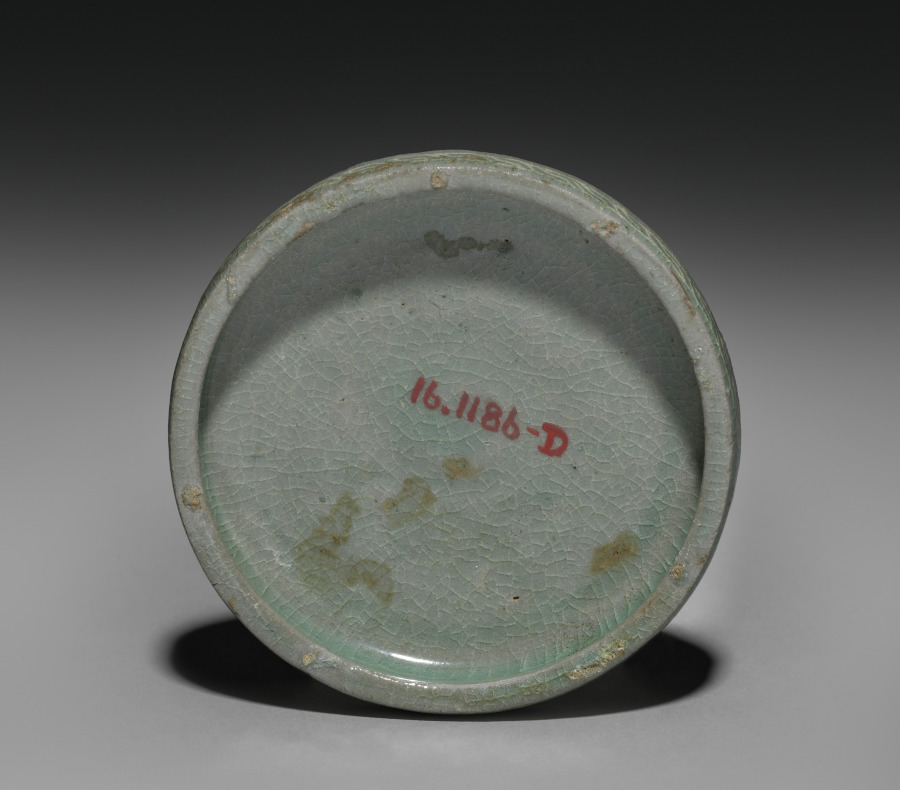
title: Box (lid)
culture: Korea, Goryeo dynasty (918–1392)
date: 918–1392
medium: earthenware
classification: Ceramic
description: Celadons, spoons, seals, and bronze mirrors were the most common burial objects in tombs during the Goryeo period (918–1392). Once used to contain colored powder, rouge, and eyebrow gel for makeup, this small container was one of the standard goods that furnished elites' tombs. Both women and men used the grain powder of rice or millet for whitening their skin, safflower extract for rouge, and plant ash or soot for eyebrow gel. Yet, natural-looking makeup seems to have been the most favorable one in Korea according to the travelogue by Xu Jing (1091–1153), the Chinese diplomat who visited Korea in 1123.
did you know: This lidded ceramic container was used to store either incense or cosmetics.